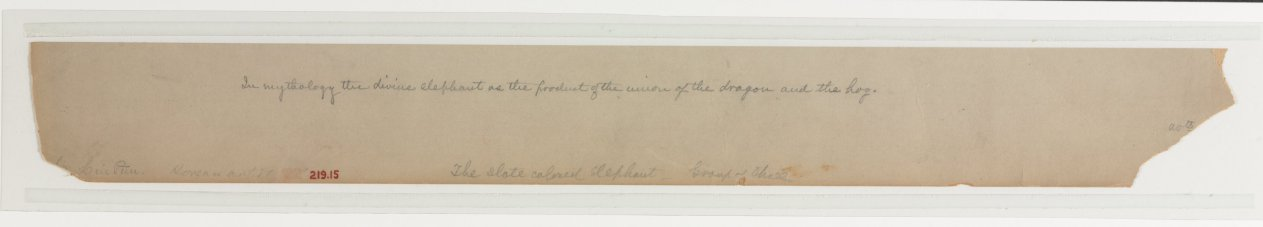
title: Samantabhadra on an Elephant with Two Attendants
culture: Korea, Joseon dynasty (1392–1910)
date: 1392–1910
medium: Ink and color on paper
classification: Painting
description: By the late 18th century, subjects that deal with Daoist immortals and their fantasy stories were increasingly chosen for paintings. For their wish-granting message, Daoist figure paintings such as this one were often commissioned to celebrate festive occasions. Judging from its dimension, this paining may have been part of either a small-size multi-panel folding screen or a large-size album that depicts a series of Daoist immortals and Buddhist deities.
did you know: The oval face with the pointy chin and wide forehead is a typical depiction of women in 19th-century paintings like this one.